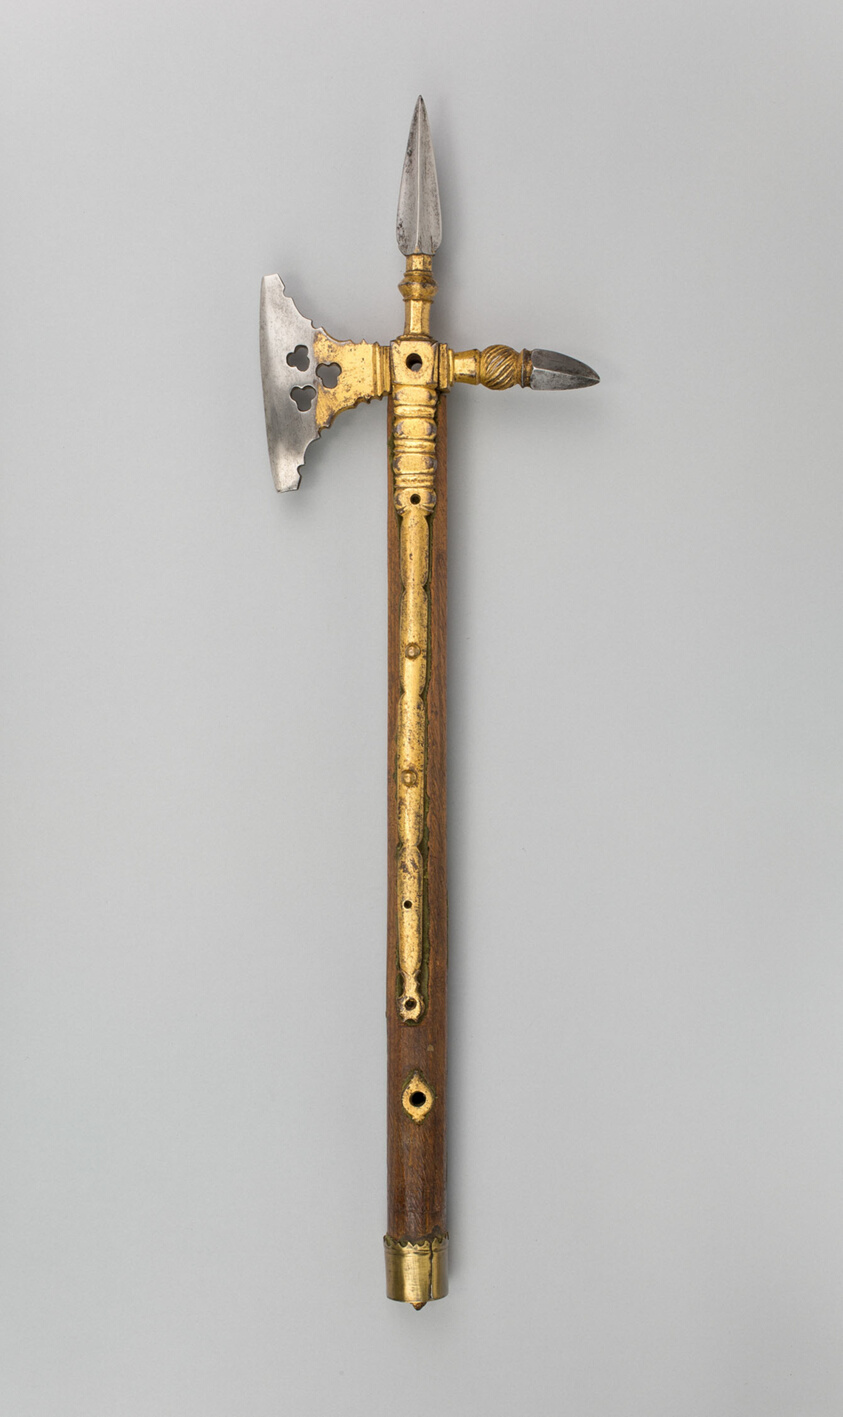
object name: Arms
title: Horseman's Axe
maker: Spanish or Flemish, Probably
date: early 16th century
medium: Steel with gilding, brass, iron, wood (oak), and attached tassel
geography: Spain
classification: edged weapon-staff; arms; arms and armor